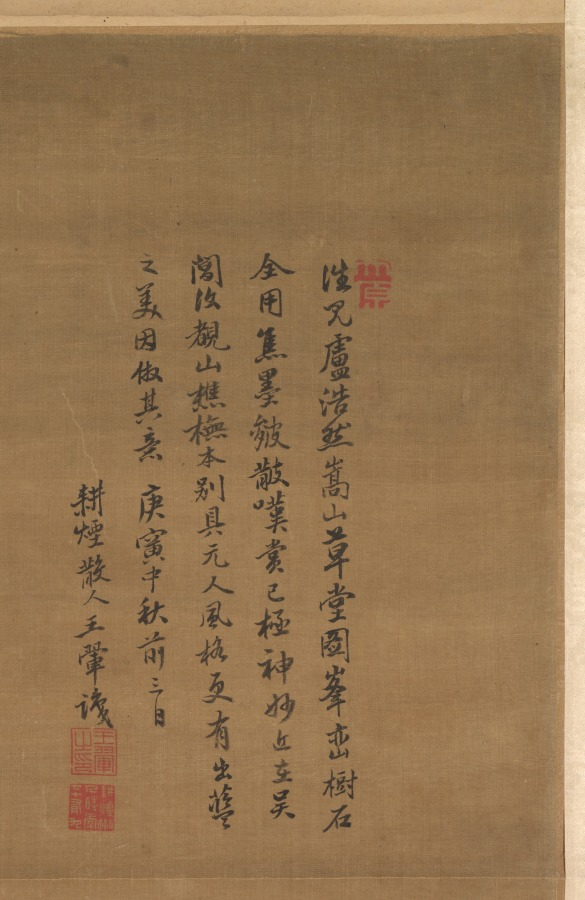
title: Landscape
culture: China, Qing dynasty (1644-1911)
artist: Wang Hui (Chinese, 1632–1717)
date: 1632–1717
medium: hanging scroll, color on silk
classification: Painting